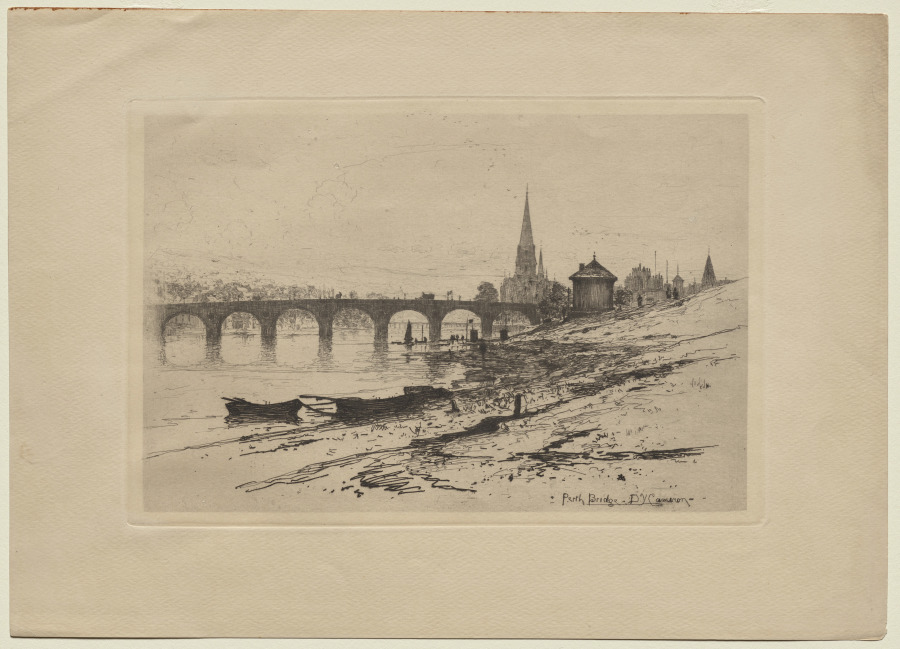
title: Perth Bridge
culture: England, late 19th Century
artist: David Young Cameron (British, 1865–1945)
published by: Messrs. Seeley & Co. in "The Portfolio," vol. XX, July 1889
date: 1889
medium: etching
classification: Print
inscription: inscribed in plate: Perth Bridge DY Cameron (l.r.)